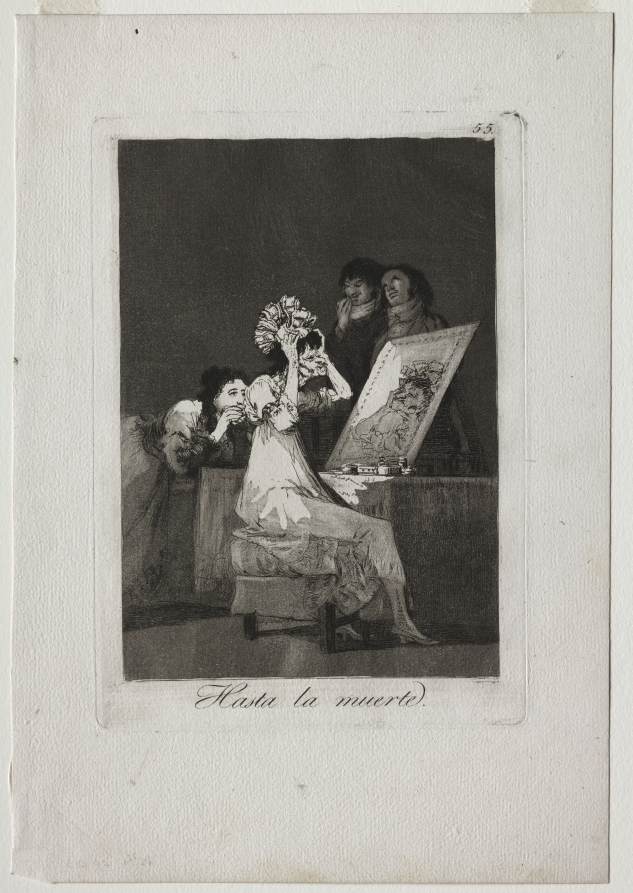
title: Until Death, Plate 55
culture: Spain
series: Los Caprichos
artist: Francisco de Goya (Spanish, 1746–1828)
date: 1799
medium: etching, drypoint and aquatint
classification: Print